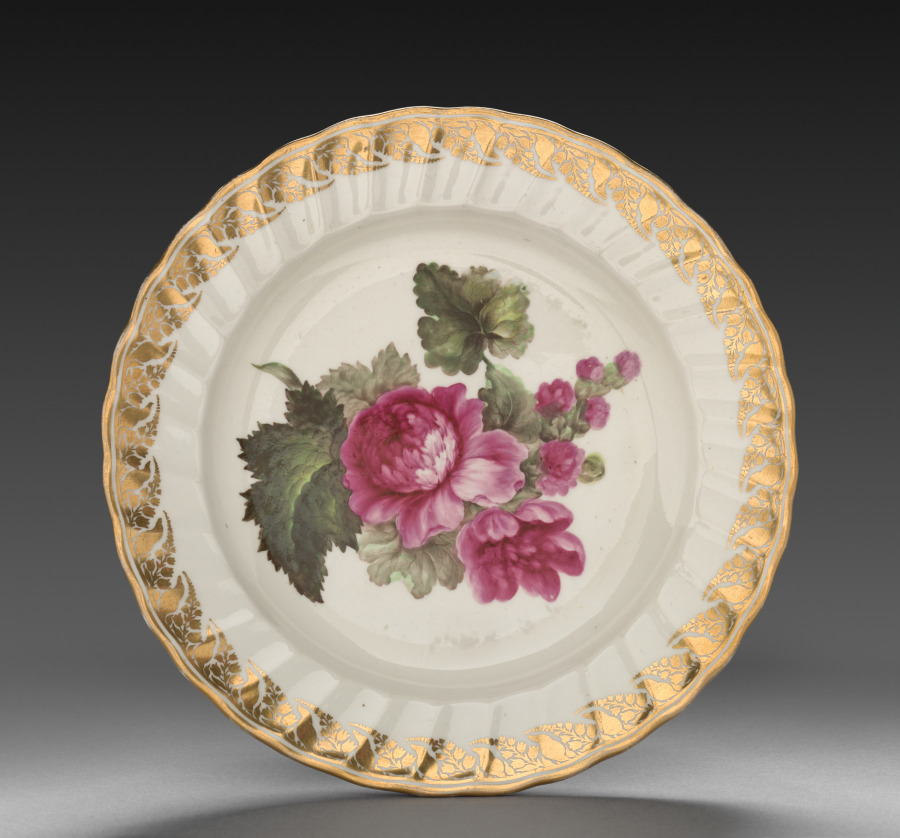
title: Plate from Dessert Service: Hollyhock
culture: England, Derby, 18th century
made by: Derby (Crown Derby Period) (British)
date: c. 1800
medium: porcelain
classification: Ceramic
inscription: inscribed in blue on back: Alcea./Hollyhock./crown/crossed batons and dots/D/115. Near edge: 9.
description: Each dish is decorated with recognizable plants, the names of which are inscribed on the base in both Latin and English. Identifying the blossoms only became customary in the late 18th century when a single piece of porcelain was decorated with one species, and flowers were represented along with leaves, stems, seed pods, and roots. All of this reflects Carolus Linnaeus’s recent invention of a scientific method to categorize all known flora. The decorations on the Derby factory’s products derive from contemporary English botanical publications. For instance, illustrations in William Curtis’s The Botanical Magazine served as models for the French marigold and nettle-leaved bell flower on the dessert service.